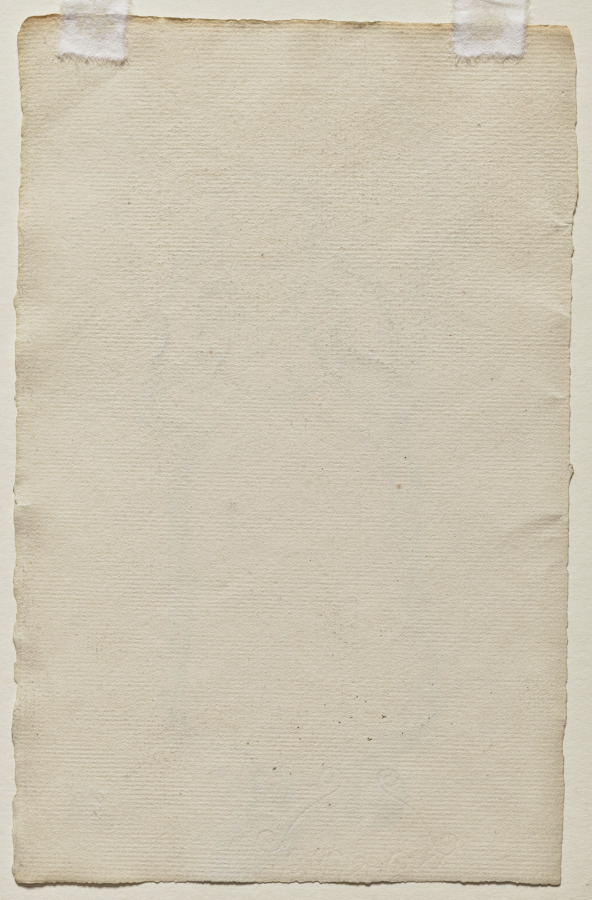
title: Study for "Seaweed Gatherers, Yport"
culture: France, 19th century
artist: Claude-Emile Schuffenecker (French, 1851–1934)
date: c. 1888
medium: black chalk on laid paper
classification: Drawing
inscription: Signed, at lower right, in black ink, with artist’s stamp (not in Lugt); watermark: ED&Cie. [inside cartouche] (Emile Desloye)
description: Claude-Emile Schuffenecker worked closely with Paul Gauguin to form Synthetism, a style of art that broke from Impressionism in favor of flat planes of bold color and invented subjects. This drawing is a study for one of Schuffenecker’s most important works, Seaweed Gatherers, Yport, which exists in two versions, one of which belongs to the Cleveland Museum of Art. The other version of the drawing (owned by the Art Institute of Chicago) was featured in an influential 1889 exhibition organized by Gauguin and Schuffenecker at the Café Volpini on the grounds of the Universal Exposition. Both artists saw imagery of seaweed gatherers—a task undertaken by working class people in rural French coastal towns—as exemplifying the simplicity they sought in their art.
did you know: Claude-Emile Schuffenecker met Paul Gauguin while the two were working at the same Parisian stockbrokerage. They both abandoned their jobs to become professional artists following a market crash in 1882.